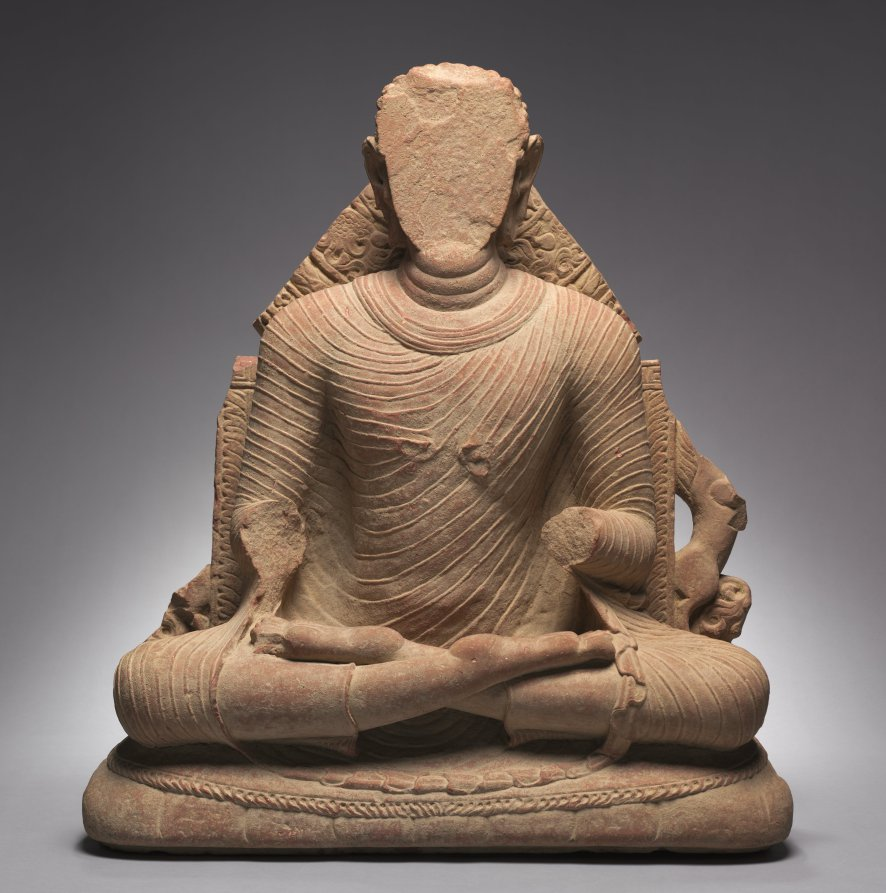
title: Seated Buddha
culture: Northern India, Uttar Pradesh, Mathura, Gupta period (c. 320-550)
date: 400–430 CE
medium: red mottled sandstone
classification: Sculpture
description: This rare depiction of a seated Buddha from Mathura, datable to the first half of the 5th century, displays a new vision for the form of the Buddha, in comparison to the way he was depicted during the preceding Kushan period. His appearance remains otherworldly, but his form has relaxed and the cloth softened, as seen in the way the cascading hem falls from the arm over his left leg. Traces survive of the rearing griffins of his throne and his elegant halo, which was filled with scrolling vegetation-typical features of Buddha images from this period.